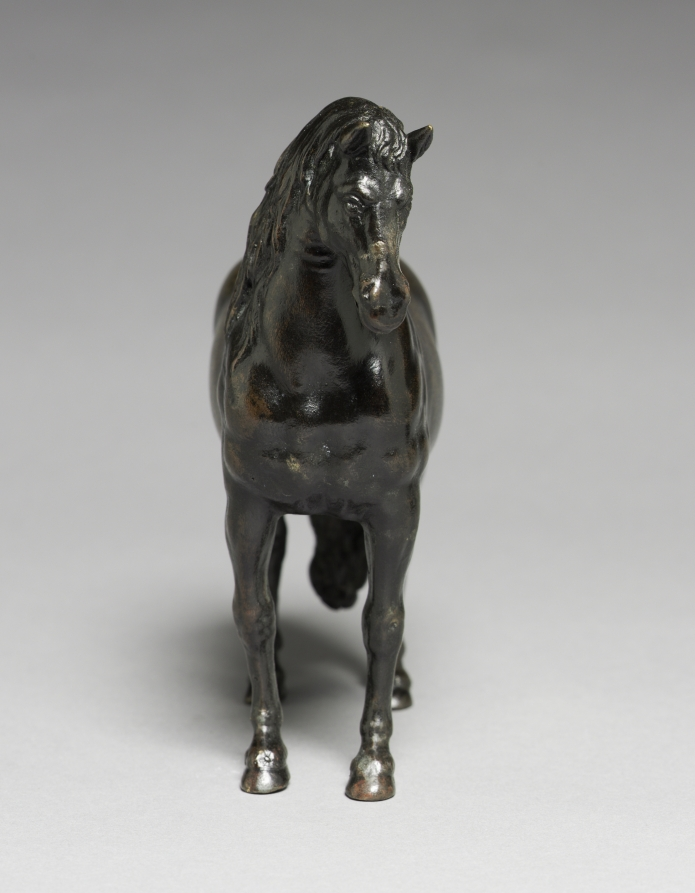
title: Horse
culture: Germany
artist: possibly cast after a model by Francesco Fanelli (Italian, 1661)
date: 1630s or later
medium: bronze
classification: Sculpture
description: Shortly after its acquisition, this work was published as a model for an equestrian monument of Emperor Maximilian by Gregor Erhart, cast by one of Maximilian's bronze founders in Augsburg. Recent scholars have questioned the connection to Erhart and have placed it closer to Fanelli, due to the rendering of the horse's head and the waxy overall feel of the modeling. Related works in Braunschweig and (formerly) Berlin already carry attributions to a Fanelli model.